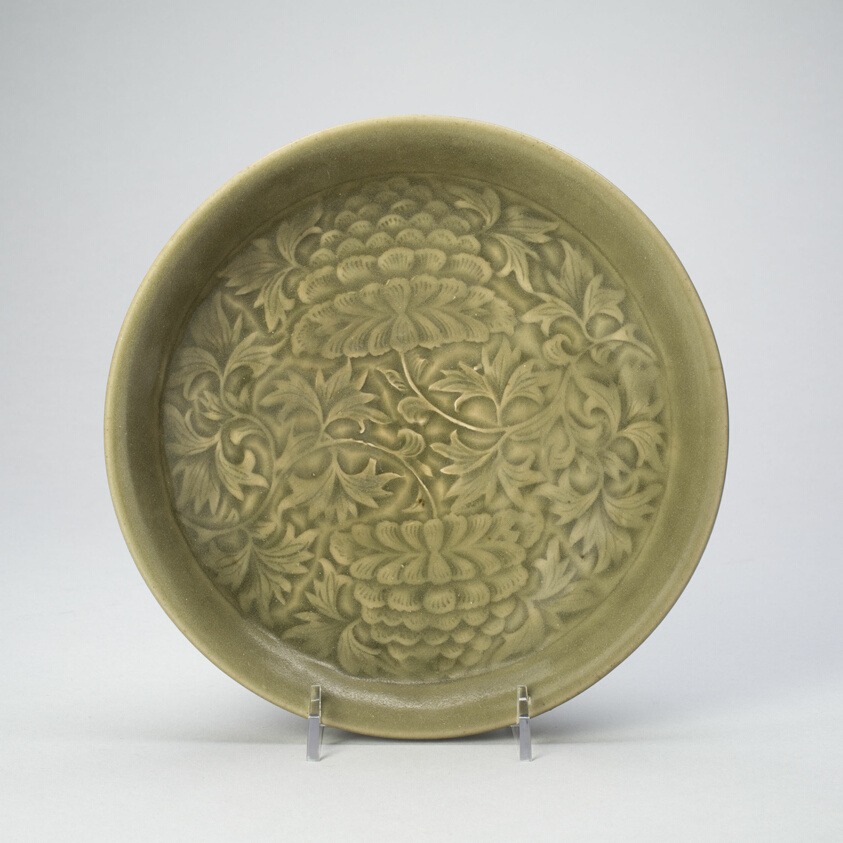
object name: Vessel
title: Dish with Peony Scroll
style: Chinese (culture or style)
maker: China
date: Jin dynasty, (1115–1234), early 12th century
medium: Yaozhou ware; stoneware with underglaze molded decoration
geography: China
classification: dish (vessel); stoneware; asian art; ceramics; vessel